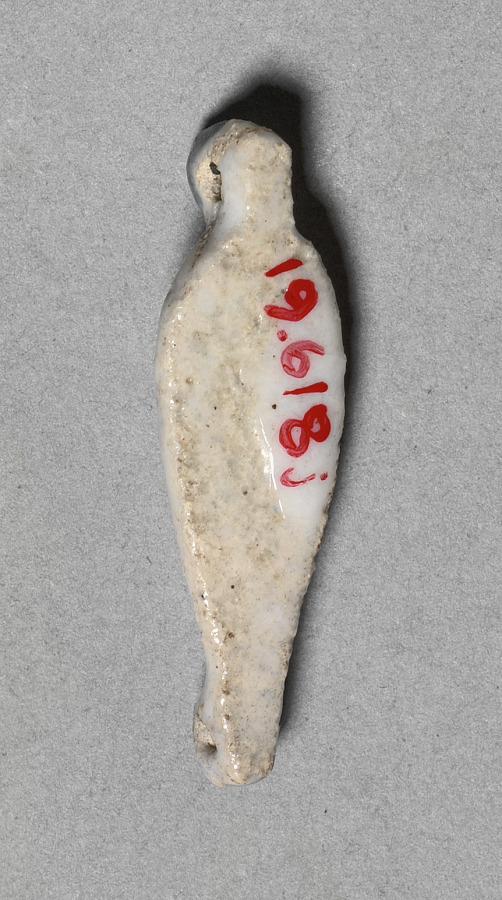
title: Petal-Shaped Bead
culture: Egypt, New Kingdom (1540–1069 BCE), Dynasty 18, reign of Amenhotep III (1390–1352 BCE)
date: c. 1391–1353 BCE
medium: faience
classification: Jewelry